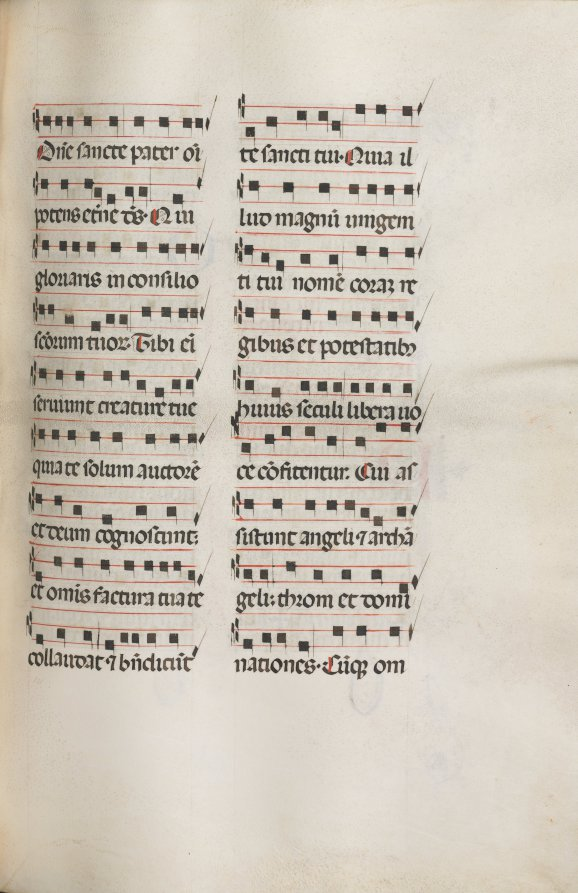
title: Missale: Fol. 112: contains some music as part of Palm Sunday liturgy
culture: Italy, Perugia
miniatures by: Bartolommeo Caporali (Italian, c. 1420–1503)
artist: assisted by Giapeco Caporali (Italian, d. 1478)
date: 1469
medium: ink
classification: Bound Volume